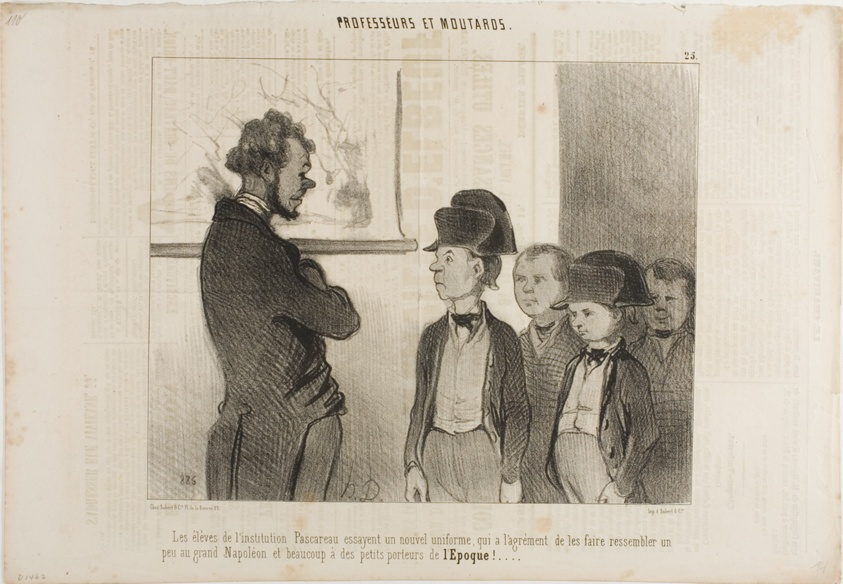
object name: Print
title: The pupils of the Institute Pascareau are trying their new school uniform which makes them look a little like the great Napoleon and a lot like little newspaper boys, plate 25 from Professeurs Et Moutards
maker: Honoré Victorin Daumier; French, 1808-1879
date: published May 16, 1846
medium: Lithograph in black on cream wove paper, with text added in another hand and letterpress verso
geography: France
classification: lithograph; print; prints and drawing